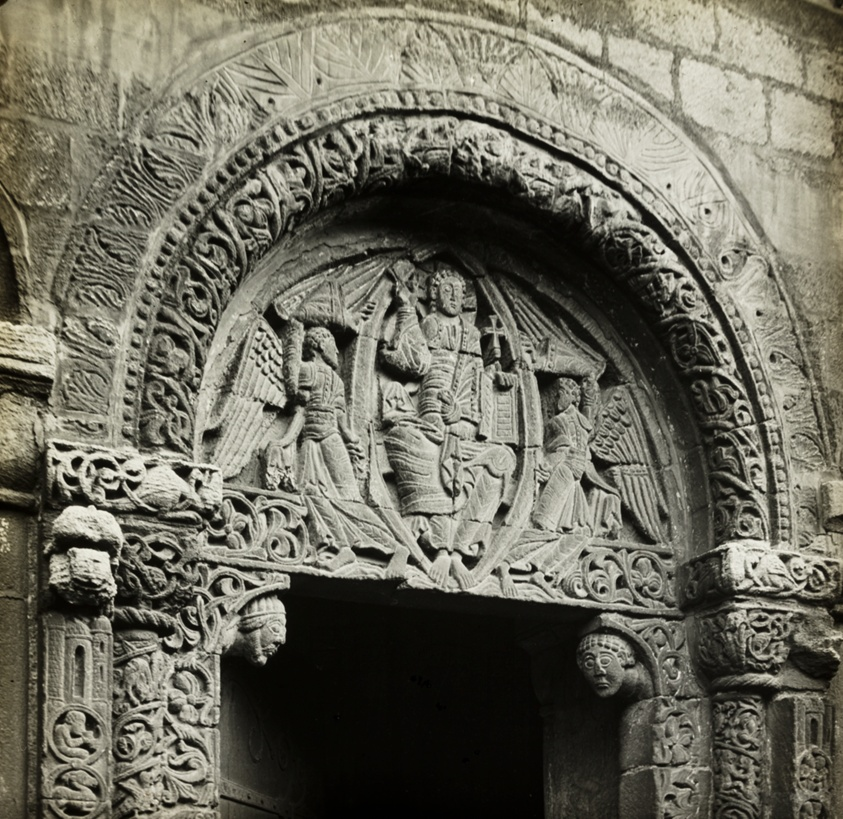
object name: Photograph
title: Ely Cathedral: Carving Over Prior's Door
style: Pictorialism, 19th century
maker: Frederick H. Evans (English, 1853–1943)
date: 1891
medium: Lantern slide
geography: England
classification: photograph; photography